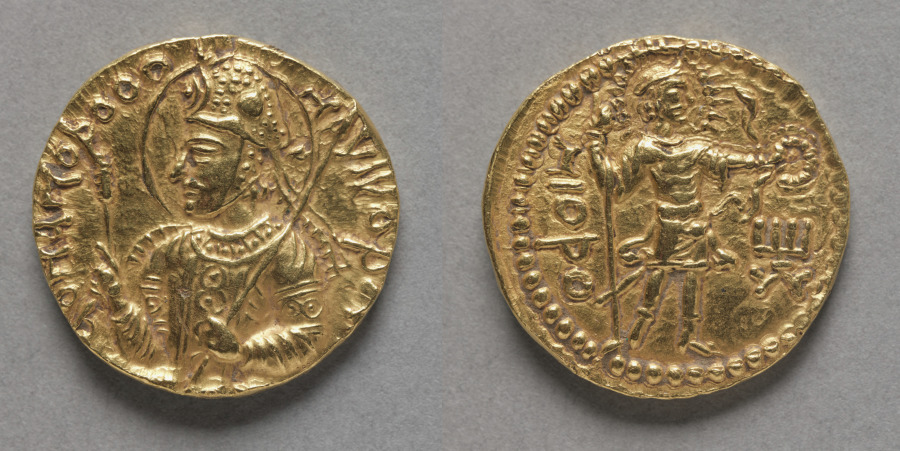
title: Coin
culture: India, Mathura, Kushan period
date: c. 106–149 CE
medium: gold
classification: Coins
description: This gold coin represents the reign of the Kushana ruler, Havishka. The coin bears a portrait of the ruler on the obverse and various deities on the reverse. It is identified by inscriptions in Kharosthi, the language used in northwestern India during the Kushan period.